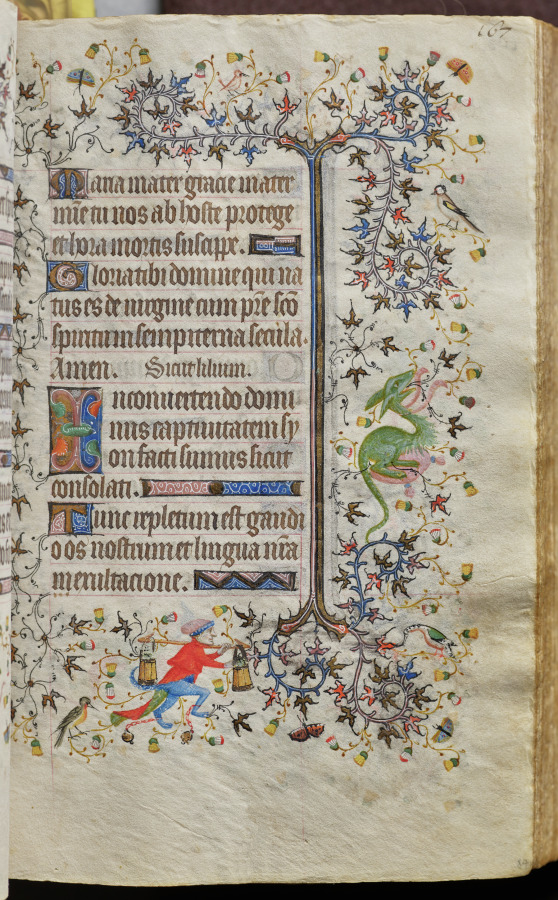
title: Hours of Charles the Noble, King of Navarre (1361-1425): fol. 84r, Text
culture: France, Paris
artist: Master of the Brussels Initials and Associates (French)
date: c. 1405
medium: ink, tempera, and gold on vellum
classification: Bound Volume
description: This precious volume was obviously highly prized by its owner, the French-born King of Navarre, who had his coat of arms painted on no less than twenty folios. Rather than directly commissioning this manuscript from a specific workshop, it seems that Charles the Noble acquired his book of hours -- perhaps ready-made for the luxury market -- while on a trip to Paris in 1404-05. A collaborative effort, six painting styles are evidenced within the pages of this codex, those of two Italians, two Frenchmen, and two Netherlanders. The painter who was responsible for the planning and decoration of the book, and who produced seventeen of the large miniatures, was a Bolognese artist known as the Master of the Brussels Initials. His principal assistant, responsible for most of the borders, was a Florentine who signed his name "Zecho" da Firenze on folio 208 verso.